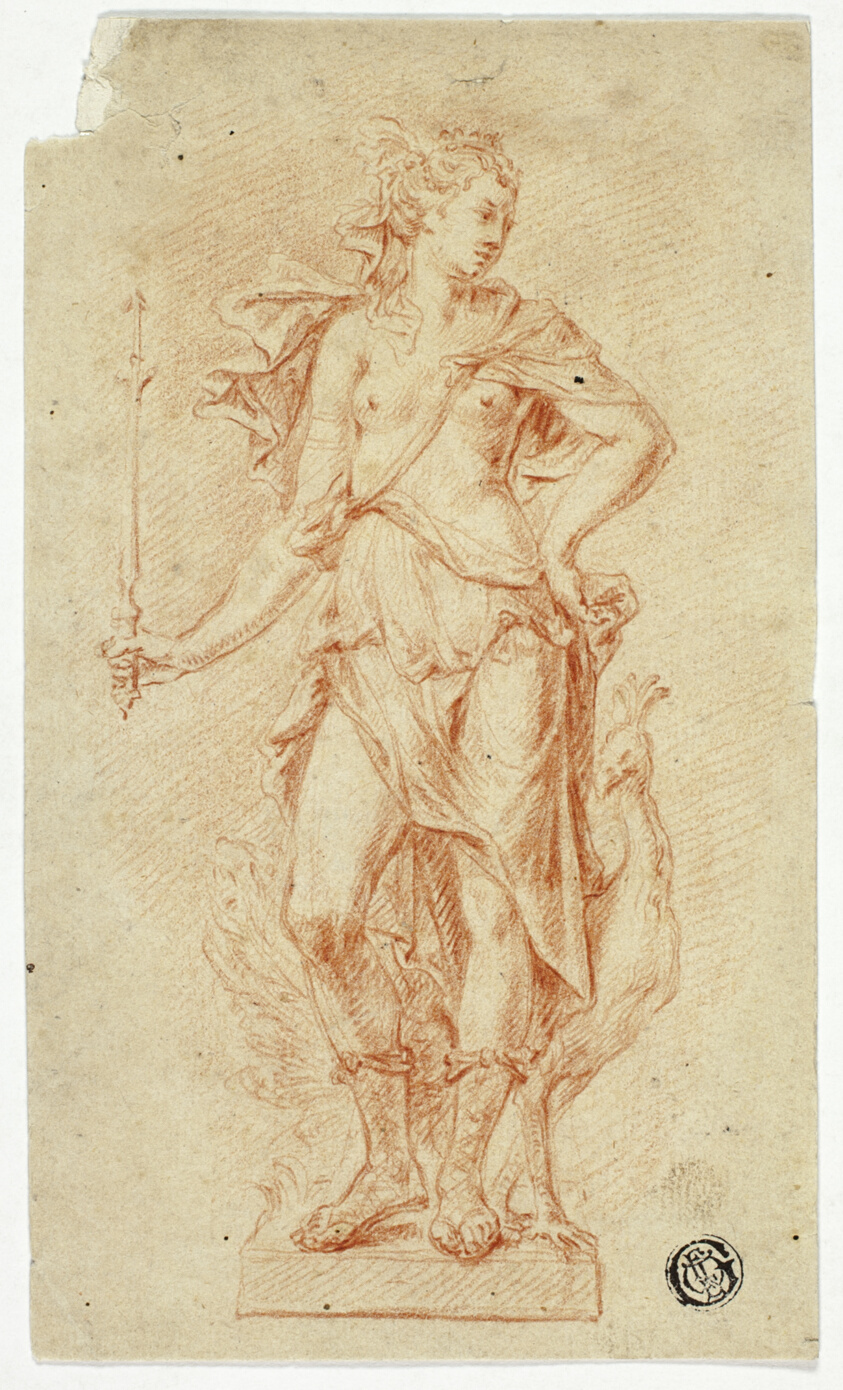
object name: Drawing and Watercolor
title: Statue of Juno with Scepter and Peacock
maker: Unknown Artist; European, 17th/18th century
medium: Red chalk on cream laid paper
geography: Flanders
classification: chalk; drawings (visual works); prints and drawing